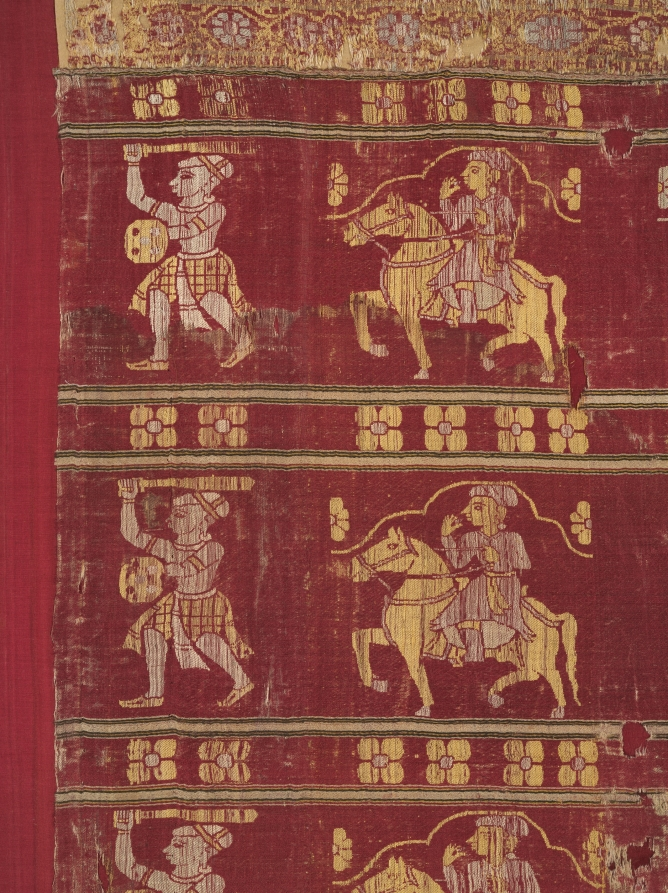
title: Tent Hanging (Part of a Larger Piece)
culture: India, Gujarat, Ahmadabad, 16th-early 17th century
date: 1560–1610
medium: Silk; lampas weave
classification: Textile